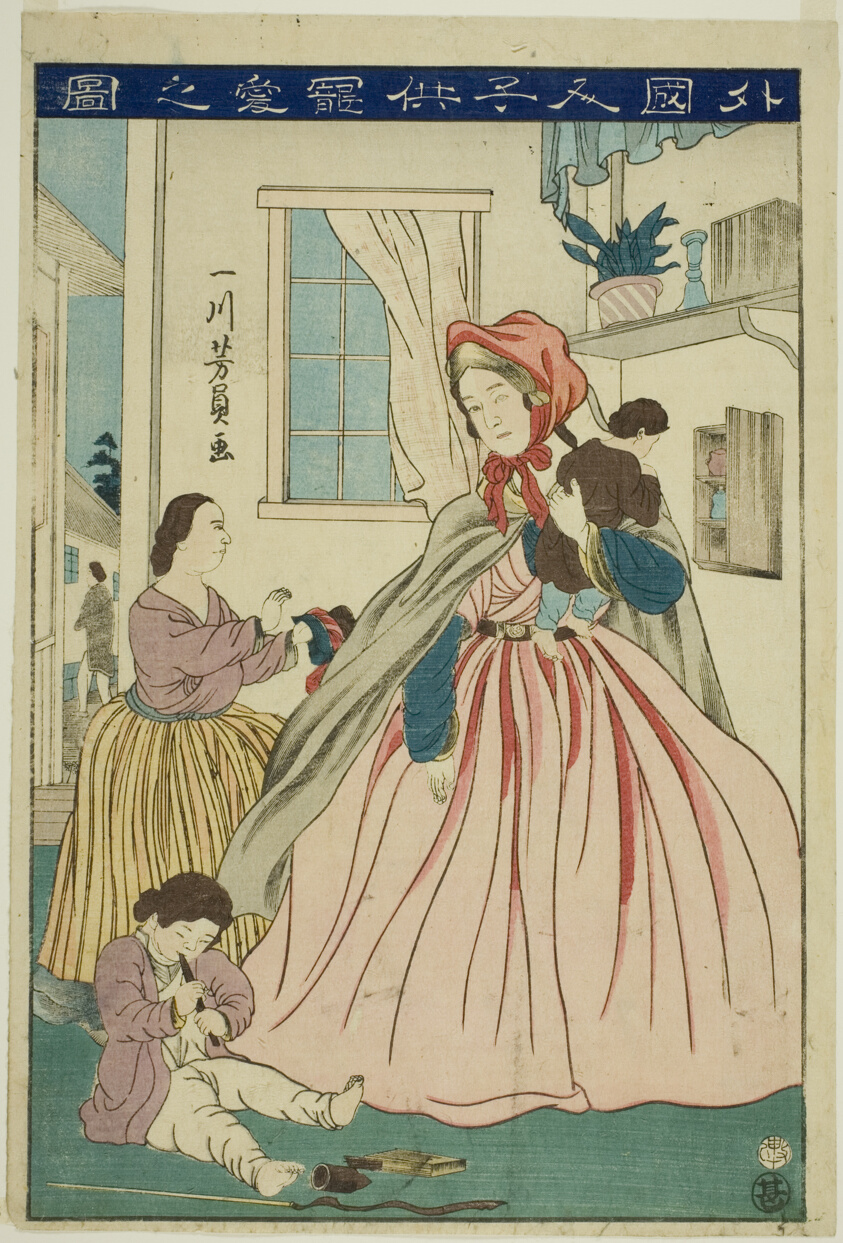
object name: Print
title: Foreigner Caring for Her Children (Gaikokujin kodomo choai no zu)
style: Japanese (culture or style)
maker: Utagawa Yoshikazu (Japanese, active c. 1850–70)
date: 1860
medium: Color woodblock print; oban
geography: Japan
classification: woodblock print; print; asian art